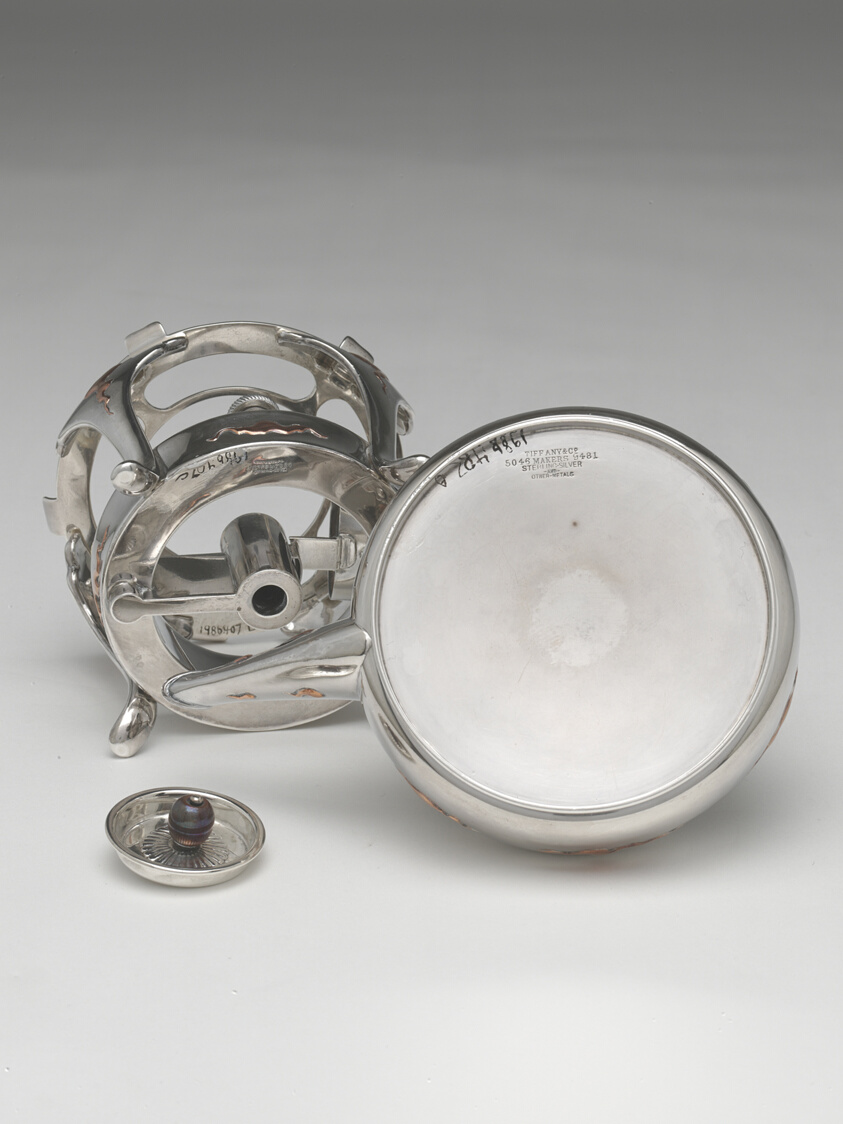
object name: Metalwork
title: Teakettle and Stand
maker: Design attributed to Edward C. Moore (American, 1827–1891); Tiffany and Company (American, founded 1837); New York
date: tea kettle: 1877; stand: 1889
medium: Silver with copper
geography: New York City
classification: kettle (vessel); teaware; silver; american decorative arts; american arts; decorative arts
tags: dining, drinking